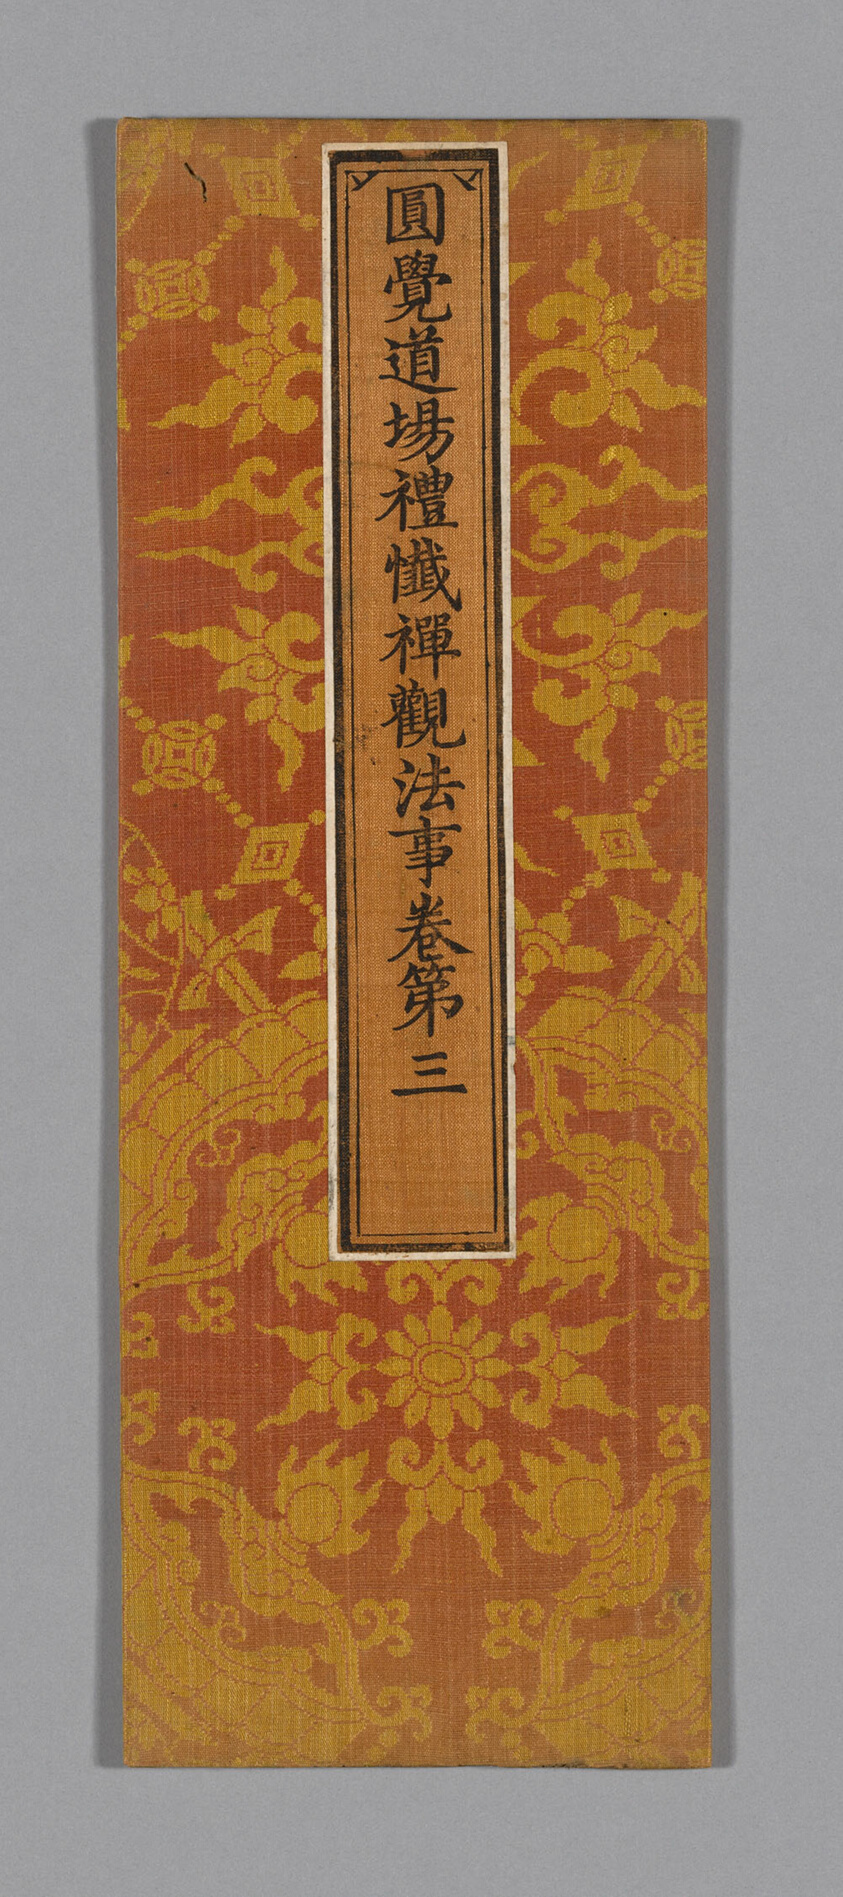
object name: Textile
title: Sutra Cover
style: ming, Chinese (culture or style), East Asian, asian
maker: China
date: Ming dynasty (1368–1644), c. 1590's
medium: Silk, plain weave double cloth; wrapped over cardboard and backed with paper; applied label of silk, plain weave; with inscribed title painted and/or printed with ink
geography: China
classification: textile; weaving